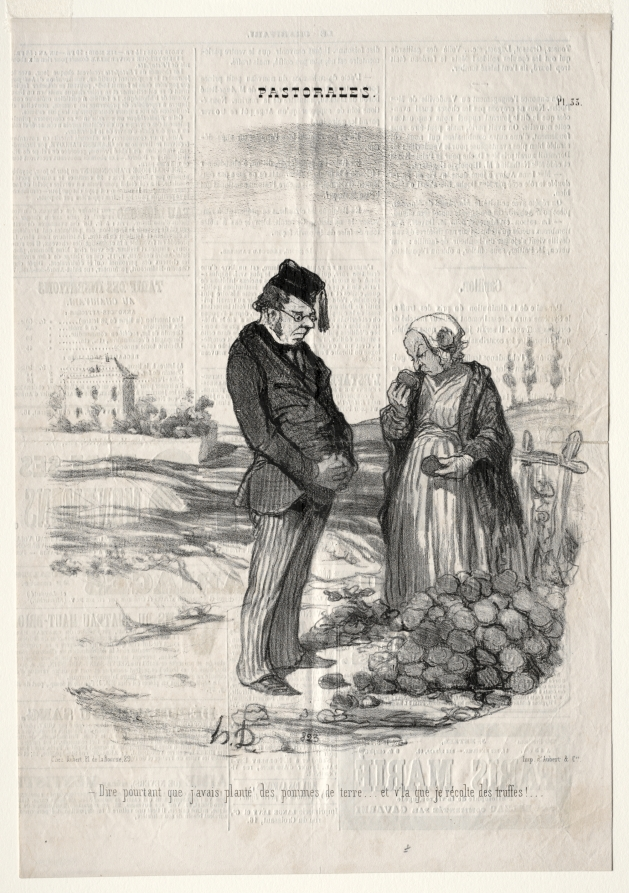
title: How strange.... I had planted potatoes, and here I am harvesting truffles!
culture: France, 19th century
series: Pastorals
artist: Honoré Daumier (French, 1808–1879)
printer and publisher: Aubert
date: 1845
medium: lithograph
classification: Print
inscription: Above image, printed: PASTORALES. / Pl. 33 ; Below image, printed: -Dire pourtant que j'avais planté des pommes de terre . . . et v'la que je récolte des truffes! . . . ; lower margin, printed: Chez Aubert, Pl. de la Bourse, 29. / Imp. d'Aubert & Cie.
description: This print was published in Le Charivari (November 19, 1845) as plate 33 from the series Pastorals.